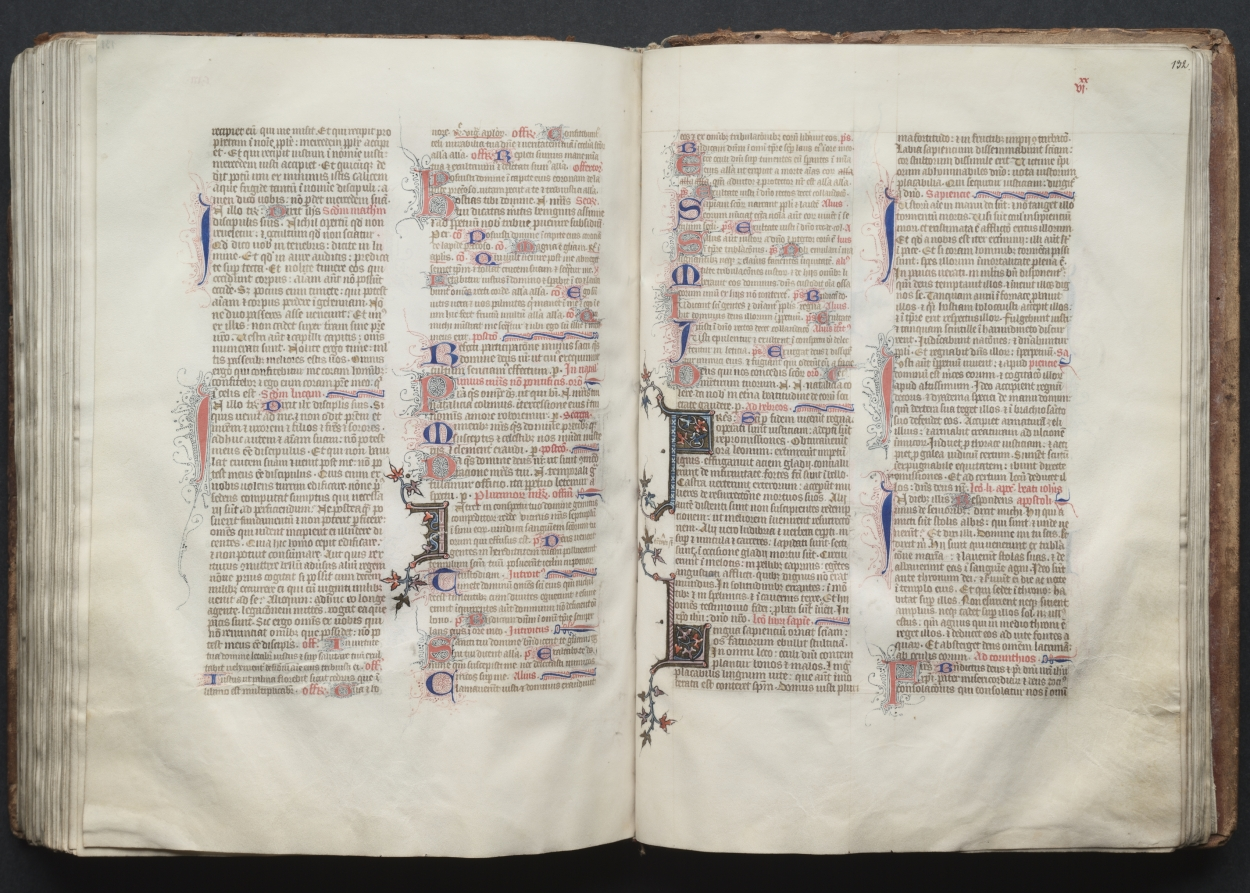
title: The Gotha Missal: Fol. 132r, Text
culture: France, Paris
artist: Master of the Boqueteaux (French)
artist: and Workshop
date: c. 1375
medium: ink, tempera, and gold on vellum; blind-tooled leather binding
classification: Bound Volume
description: The style and quality of this manuscript's decoration is typical of deluxe Parisian books made for aristocratic or royal patrons. Most of the book's decoration appears to be the work of the Master of the Boqueteaux, an artist active at the court of King Charles V (died 1380). His style was apparently shared by a number of book illuminators working in and around Paris. It is very possible that the Gotha Missal belonged to Charles V, but is not provable because the manuscript has no royal portraits and lacks a colophon. Given the book's magnificent decoration, however, it would seem that it was produced for a Valois prince, if not for the king himself. The manuscript receives its name from the German dukes of Gotha, its later owners.